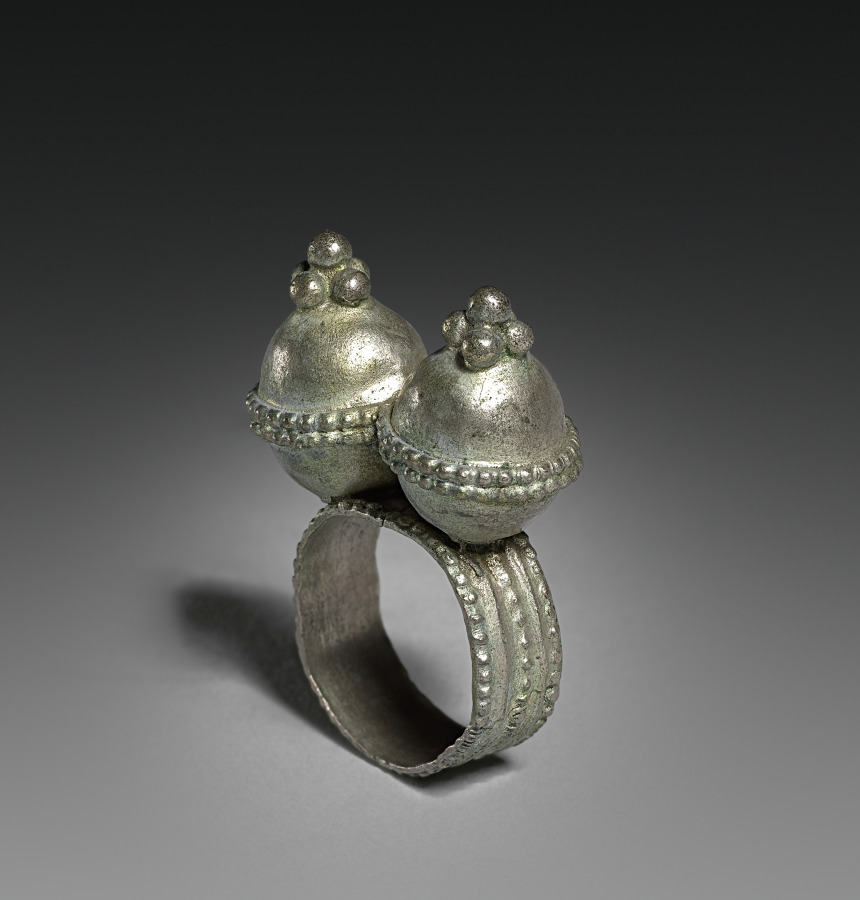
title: Ring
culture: India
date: early 1900s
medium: silver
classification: Jewelry